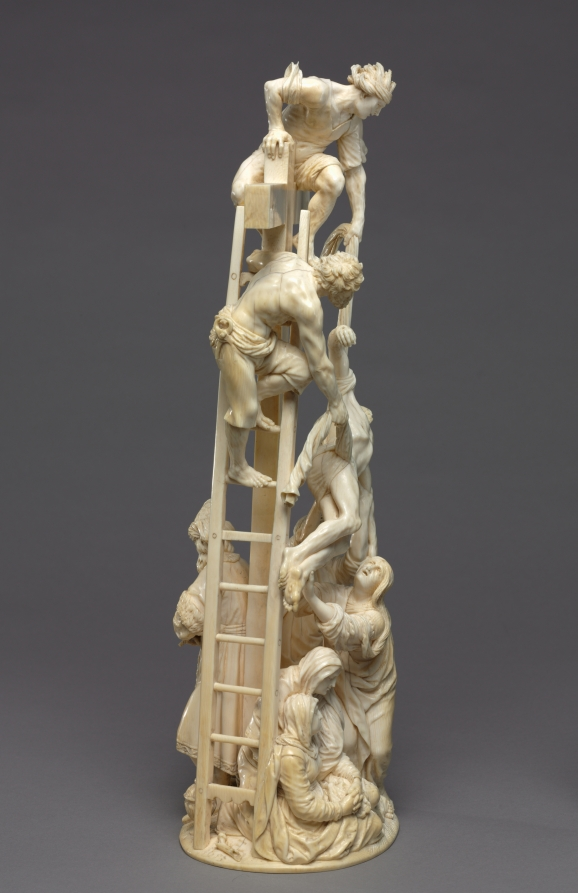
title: Descent from the Cross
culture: Austria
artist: Adam Lenckhardt (German, 1610–1661)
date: 1653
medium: ivory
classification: Sculpture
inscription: inscribed with monogram "AL" conjoined and dated 1653.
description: Carved from a single piece of ivory for Prince Karl Eusebius von Liechtenstein of Vienna, this work is a true tour-de-force. It took Lenckhardt seven years to complete; it is his last known sculpture and the pinnacle of his career. The biblical accounts of the descent from the cross found in the gospels are not consistent, which may contribute to the difficulty in precisely identifying the figures. The Virgin Mary, Saint John, Mary Magdalene, and others were said to be present, but undoubtedly there are other disciples here mourning Christ’s death. The intense emotion registers on the faces of the figures in the scrupulous and exquisitely detailed work.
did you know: Carved from a single elephant tusk, the artist took special care to ensure the ivory did not crack or break as he meticulously crafted each figure in this visually exciting sculpture. Look closely to find tools and small objects included near its base.